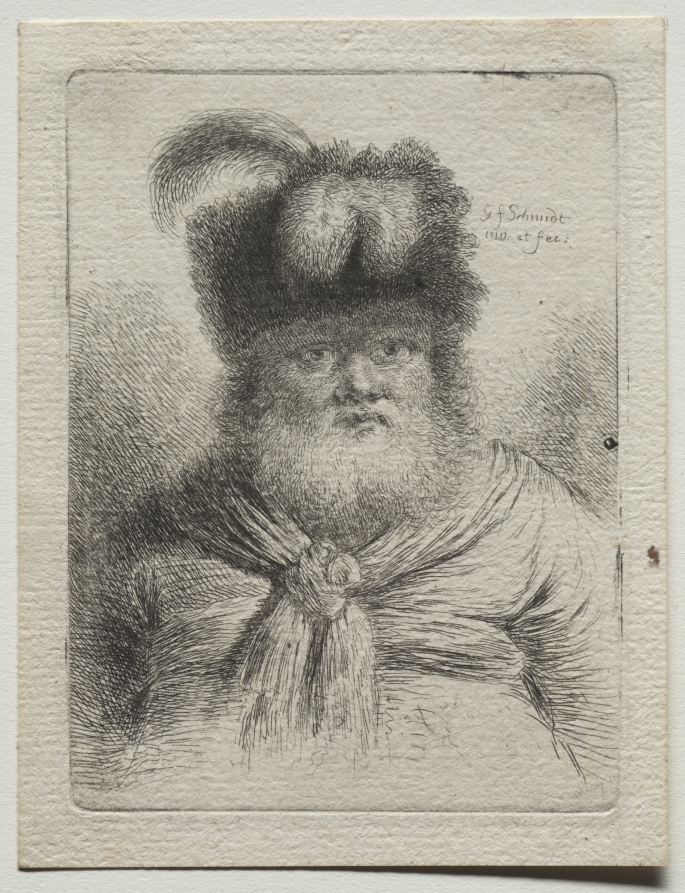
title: Old Man in a Fur Hat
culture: Germany, 18th century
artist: Georg Friedrich Schmidt (German, 1712–1775)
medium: etching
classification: Print